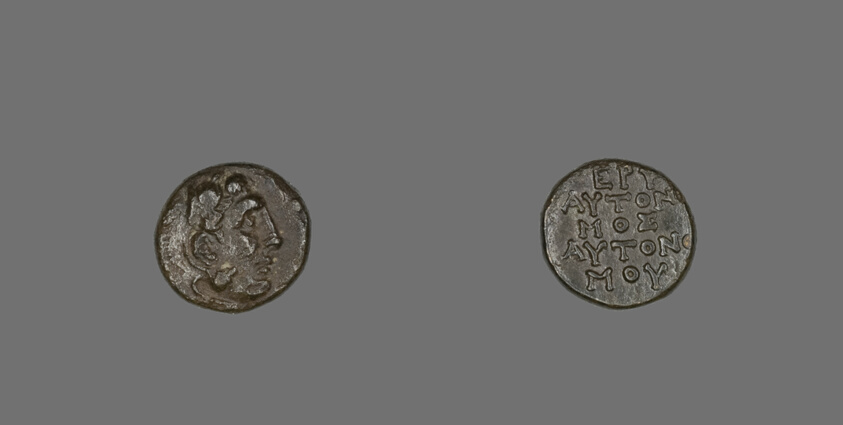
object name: Coin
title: Drachm (Coin) Depicting the Hero Herakles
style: greek, ancient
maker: Greek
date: about 300-200 BCE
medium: Bronze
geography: Greece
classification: coin; ancient art; struck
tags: Heracles